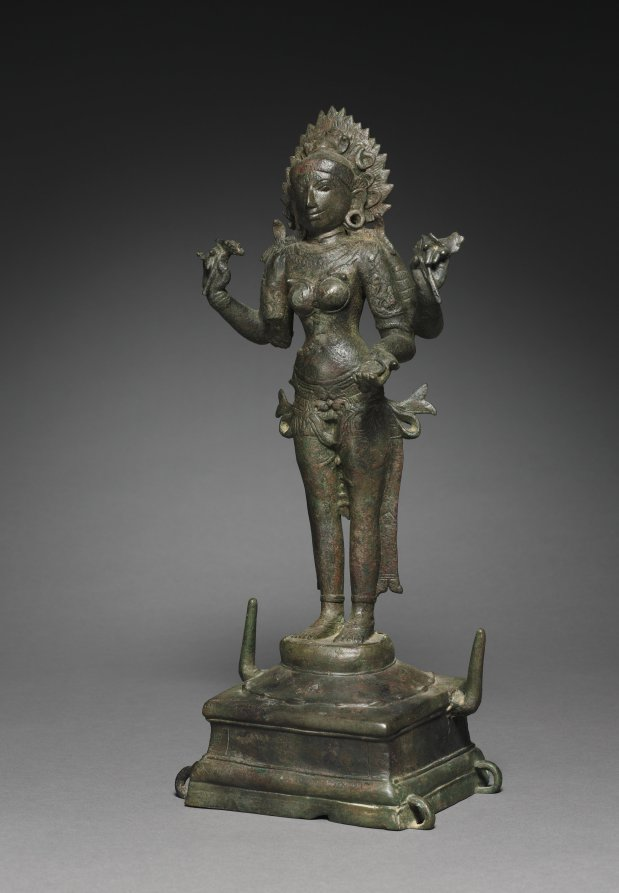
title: Kali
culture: South India, Tamil Nadu, Chola period (900-13th century)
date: 900s–1000s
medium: bronze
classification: Sculpture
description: The female aspect of Shiva, the goddess Parvati, has her own cycle of myths, and she herself emanates into different forms. Some branches of Hinduism consider the goddess to be the supreme creator divinity herself, who generated all the other gods, including Shiva. This bronze sculpture could have been affiliated with either branch. Kali is the wrathful form of the goddess generated in the midst of a battle with a demon that the gods failed to conquer. Kali was to drink his blood before any drop fell to ground, or else a new demon would instantly be generated. The demons are metaphors for human vices, such as egotistic pride and arrogance.